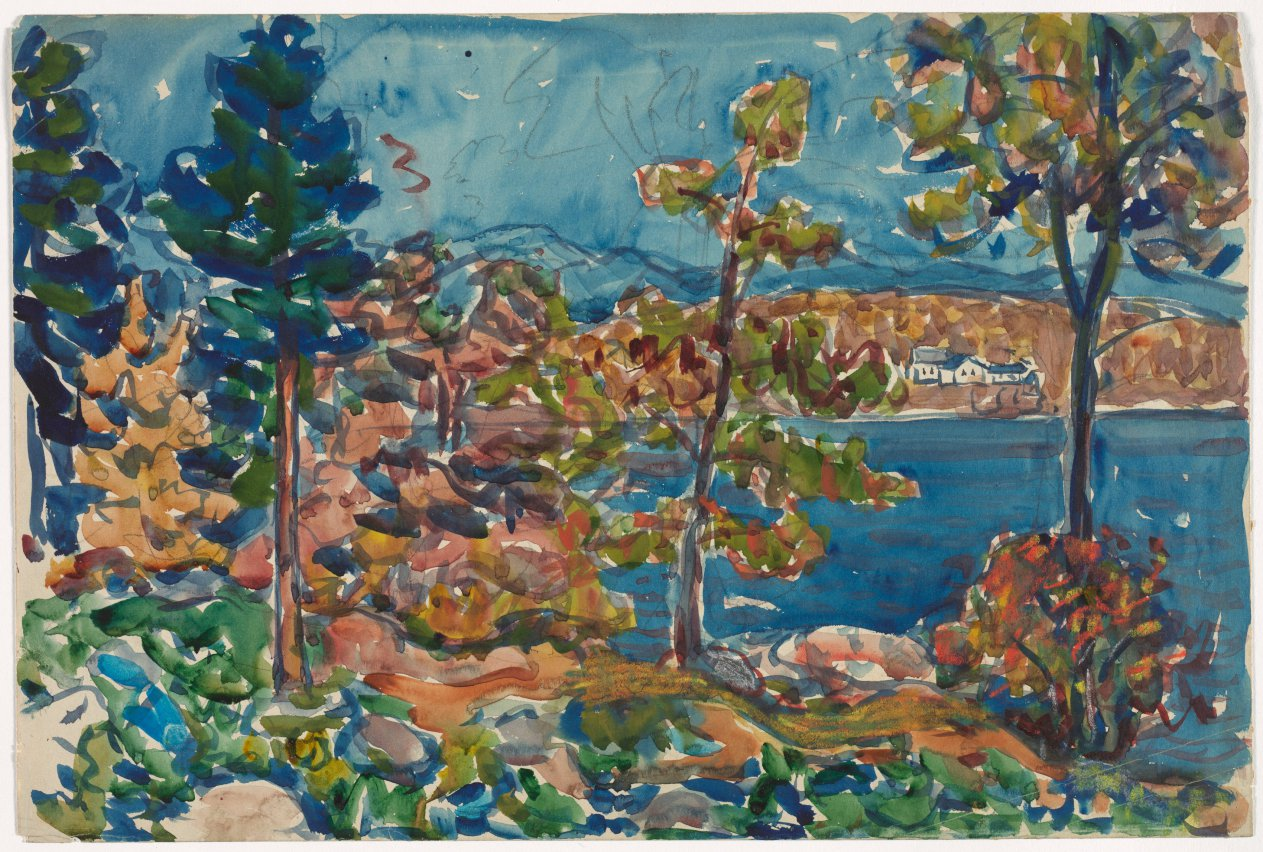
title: By the Shore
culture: America, late 19th-early 20th Century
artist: Maurice Prendergast (American, born Newfoundland [now Canada], 1858–1924)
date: c. 1910–13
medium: watercolor with pastel over graphite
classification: Drawing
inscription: Verso, upper left, in graphite: 10